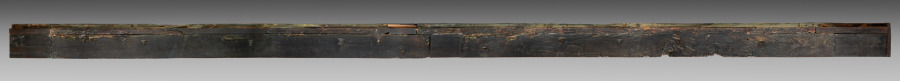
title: Upper Paneling from a Sacristy Armoire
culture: Italy, Florence, late 15th century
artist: attributed to Giuliano da Maiano (Italian, 1432–1490)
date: c. 1460–1475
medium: walnut, inlaid with holly and ebony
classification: Furniture and woodwork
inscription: in four of the five panels is the Medici badge of a jeweled ring wound with a ribbon or bannerole, on which is inscribed the motto "Semper." The frieze in the cornice contains part of a quotation from the Vulgate, Paul's epistle to the Romans, Chapter XI.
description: The imagery on the inset panels is the result of a technique known as intarsia, the skilled inlaying of woods of different colors to create a type of mosaic, popular during the 15th and 16th centuries in Italy for the decoration of paneling and furniture for studies, small rooms, and church sacristies. This large set of five intarsia panels comes from an unknown Florentine church. In its original setting the panels rested upon a row of similarly decorated cupboards (a sacristy armoire) which were used for the storage of liturgical vestments and books. This panel would have therefore been seen at eye level. The central panel depicts the Resurrection of Christ. The two outside panels depict the emblem of Lorenzo de Medici-three plumes encircled by a jeweled ring above a scrolling ribbon containing the Latin word SEMPER (Always). Lorenzo de Medici (1449-92) was the ruler of Florence when this sacristy armoire was constructed and was the likely patron. It seems to be the work of Giuliano da Maiano, an architect and intarsia-maker also responsible for the intarsia in the sacristy of Florence Cathedral.